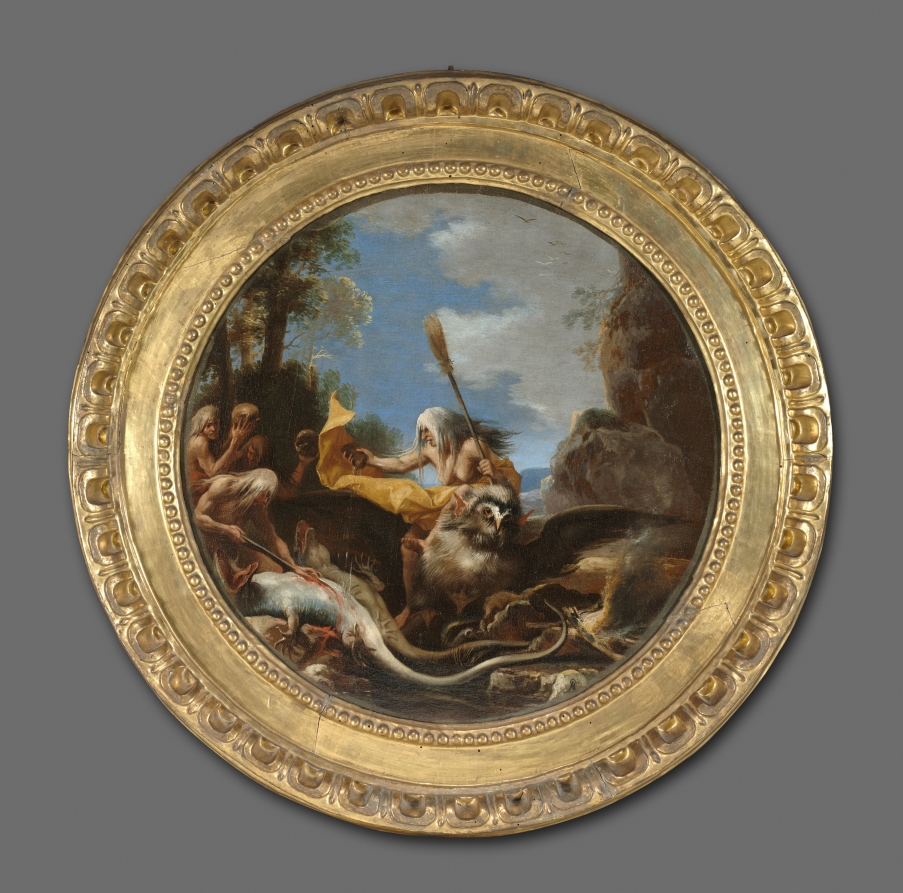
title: Scenes of Witchcraft: Day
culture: Italy, 17th century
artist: Salvator Rosa (Italian, 1615–1673)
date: c. 1645–1649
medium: oil on canvas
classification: Painting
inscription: Signed: "SR [monogram]"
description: Rosa's scene at noon showcases several hoary hags that exemplify his treatment of witches. Clutching skulls, wielding brooms, and slicing lizards, the witches prepare to travel to the Sabbath, an orgy of witches. One witch flays the skin of a thrashing lizard to extract the innards needed to concoct magical unguents, while her companions brandish skulls. Goats were the common mode of transportation for witches, but Rosa substitutes an owl, a harbinger of evil. Although Rosa foregrounds the violent cruelty of witchcraft, situating the grotesque hags in the full light of day introduces a comic aspect to the scene. Rosa's use of comedy and the unexpected to critique the world around him stemmed from the satirical poetry he wrote throughout his stay in Florence and his return to Rome in 1649. By lightening the palette and mood of the painting, Day reflects his interest in satire and his self-appointed role to expose and critique human folly.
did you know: The artist chose the painting's shape to reference the foundational role of the circle in practicing magic.